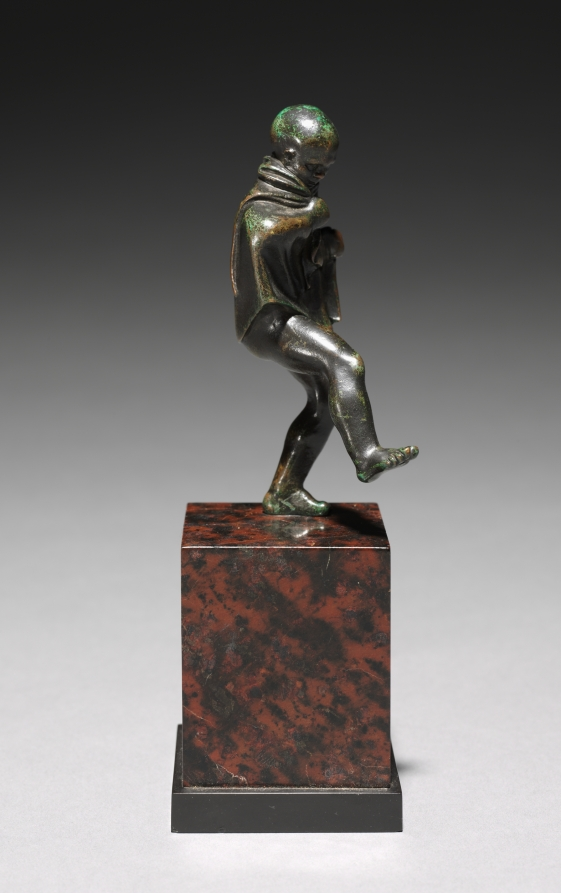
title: Dancing Boy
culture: Northern Italy, early 16th century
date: c. 1500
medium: bronze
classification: Sculpture